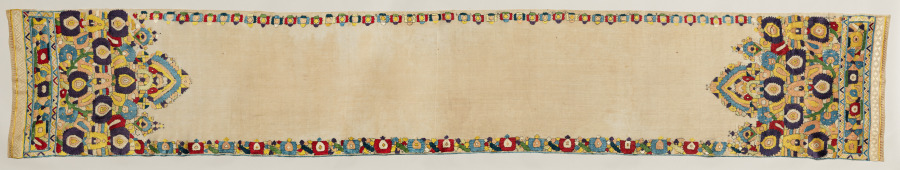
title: Mirror cover (tensifa)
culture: Africa, North Africa, Morocco, Tétouan, Moroccan embroiderer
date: 1700s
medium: Linen, silk, dye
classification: Embroidery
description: Special embroidered textiles were used by newylwed Moroccan couples to cover the mirror in their home. This was done to protect them from the evil eye and unfavorable gazes.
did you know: Satin stitch is used to produce the broad, smooth surface of the floral patterns seen here.